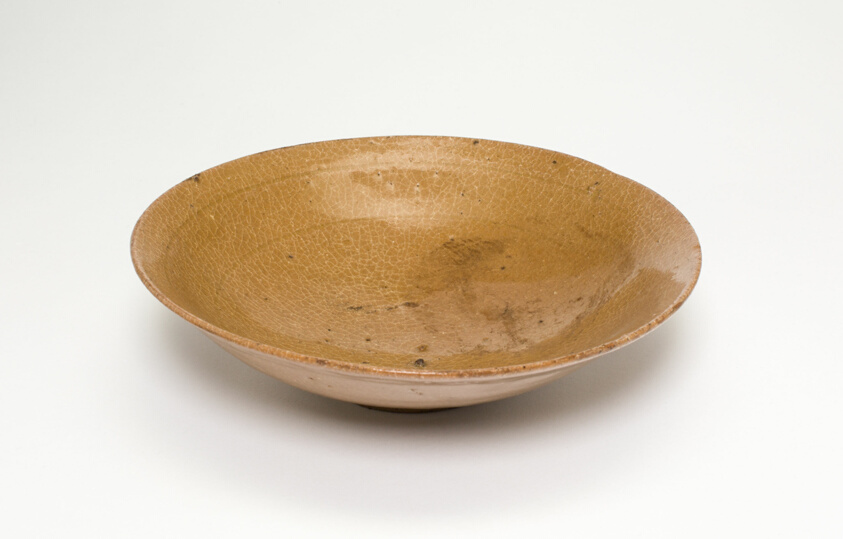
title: Bowl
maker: Korea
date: Goryeo dynasty (918–1392), 12th century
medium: Celadon-glazed stoneware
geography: Korea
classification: ceramics; asian art